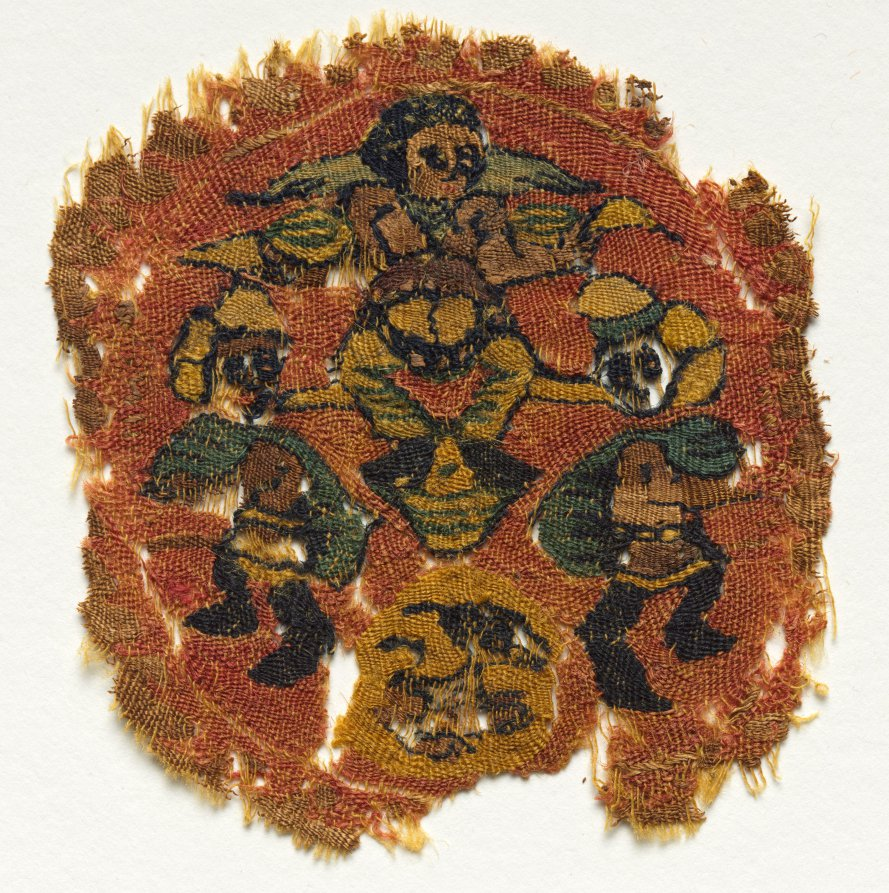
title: Segmentum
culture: Egypt, Umayyad period (661–750) or Abbasid period (750–1258)?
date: 700s - 800s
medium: tapestry weave; wool and linen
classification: Textile